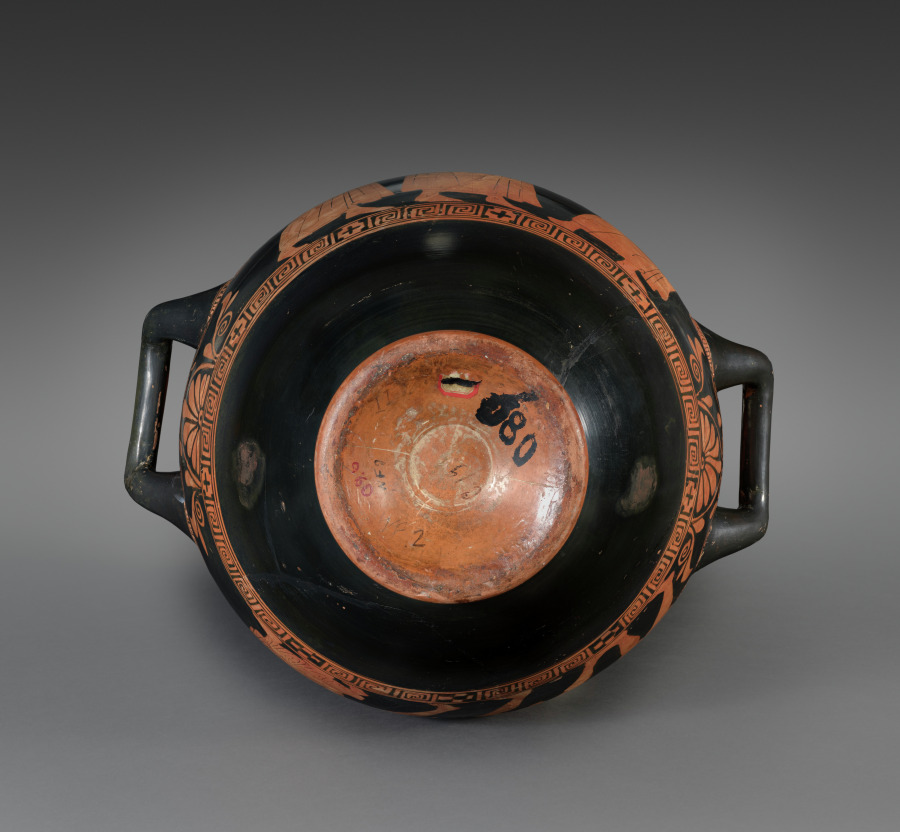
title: Red-Figure Stamnos (Mixing/Storage Vessel): Komos (Musicians and Revelers)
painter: attributed to Kleophon Painter (Greek, Attic, active c. 440–410 BCE)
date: c. 435–425 BCE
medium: Ceramic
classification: Ceramic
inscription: Κ Α Λ Ο Σ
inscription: Κ Α Λ Ο [Σ]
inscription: black '080'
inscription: black 'WF2'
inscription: black '0.19'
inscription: red '09.6'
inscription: partially removed red and white sticker, with number blacked out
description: Four lively figures move to the right across the front side of this stamnos, a vase used for storing and mixing wine. First comes a finely dressed woman playing the pipes, followed by three male figures, all nearly nude. The bearded one holds a drinking cup and reaches back, perhaps dancing, while the last in line concentrates on the music of his lyre.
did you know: The Athenian stamnos, a shape favored by the Etruscans, was made primarily for export.